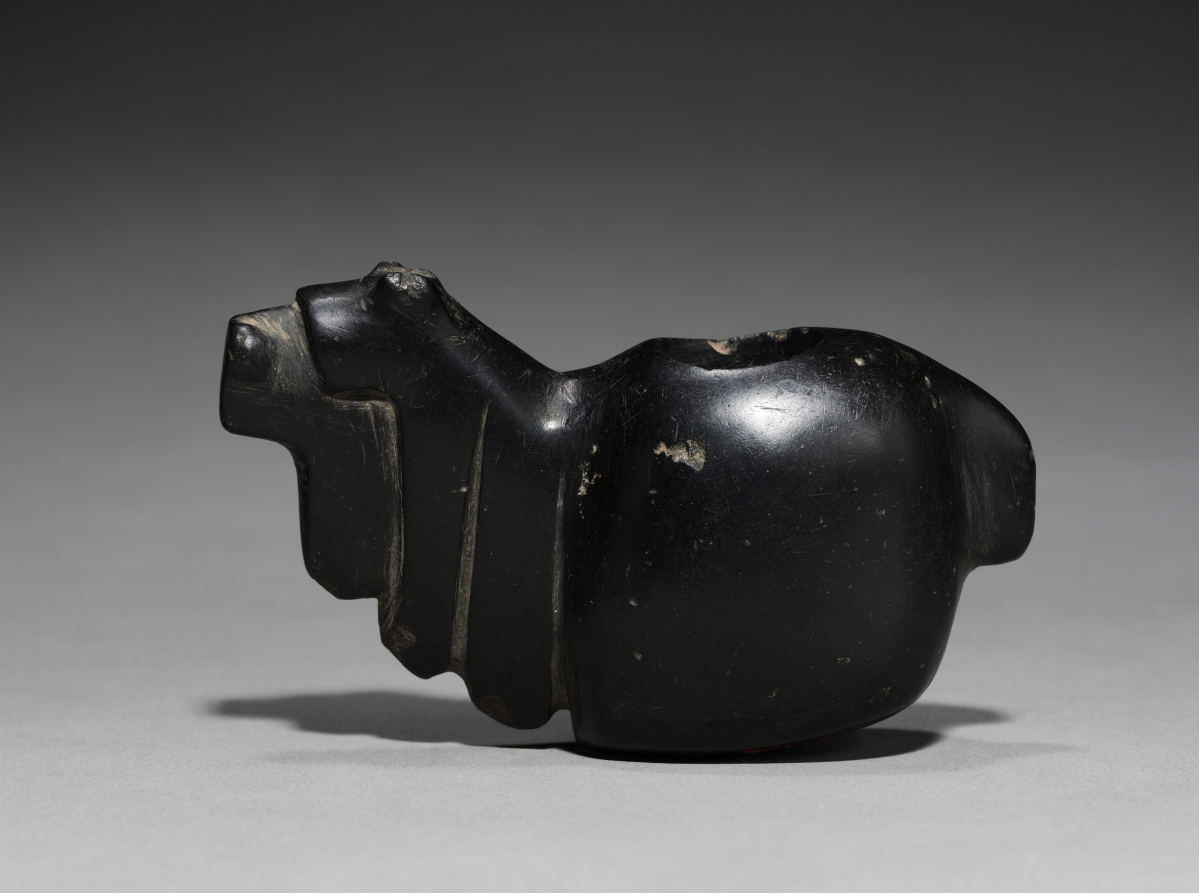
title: Alpaca Offering Container (Canopa)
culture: Peru, Inka style (1400-1532)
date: 1400–1532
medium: stone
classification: Stone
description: An unknown substance was placed in the back cavity of this alpaca before it was buried as an offering.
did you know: This stone llama was an offering buried to ensure health and fertility for domestic animals.